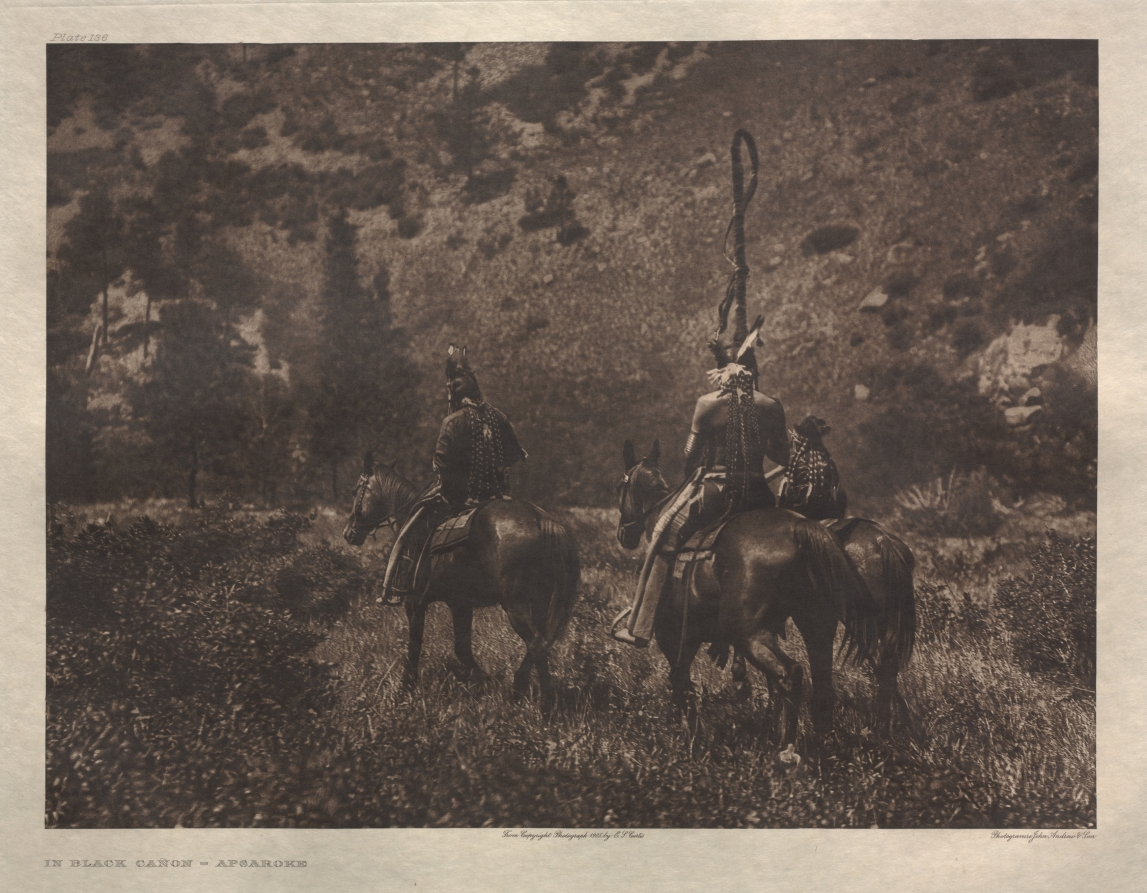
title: Portfolio IV, Plate 136: In Black Cañon--Apsaroke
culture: America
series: The North American Indian: being a series of Portfolios picturing and describing the Indians of the United States, the Dominion of Canada, and Alaska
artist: Edward S. Curtis (American, 1868–1952)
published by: The University Press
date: 1905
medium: photogravure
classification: Portfolio